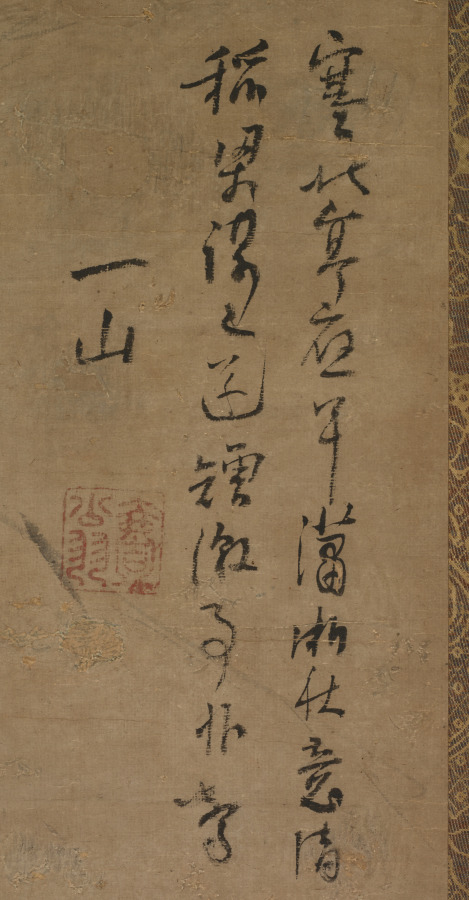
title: Reeds and Geese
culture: Japan, Kamakura period (1185–1333)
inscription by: Yishan Yining [Issan Ichinei] (Chinese, 1247–1317)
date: 1314–17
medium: hanging scroll; ink on paper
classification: Painting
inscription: signed: Issan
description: Reeds and geese has been a common pairing in Chinese literary and visual culture for many centuries. This painting presents the contribution of a Japanese amateur painter, almost certainly a Zen Buddhist monk, to Japan’s fledgling efforts to add the theme to its own cultural vocabulary in the early 1300s. As was customary at the time in Japan, the painter did not sign or seal his work; the inscription, a poem added to the painting by the eminent émigré monk Yishan Yining, along with his signature and seal, was of far greater cultural value. Today, the modestly sized painting has tremendous significance as one of the earliest surviving examples of Japanese ink paintings with reeds and geese.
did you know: Tokyo National Museum owns a copy of this painting made by Kano Gyokusen (1796–1864) when he was 14 years old.